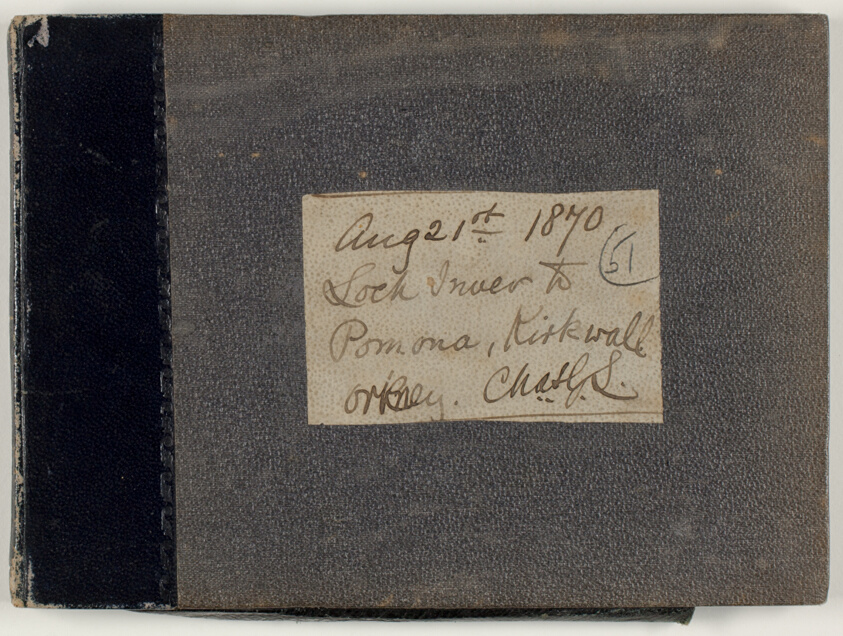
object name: Book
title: Loch Inver to Kirkwall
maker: Charles George Lewis (English, 1808-1880)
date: 1870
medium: Sketchbook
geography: England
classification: sketchbook; graphite; prints and drawing; book